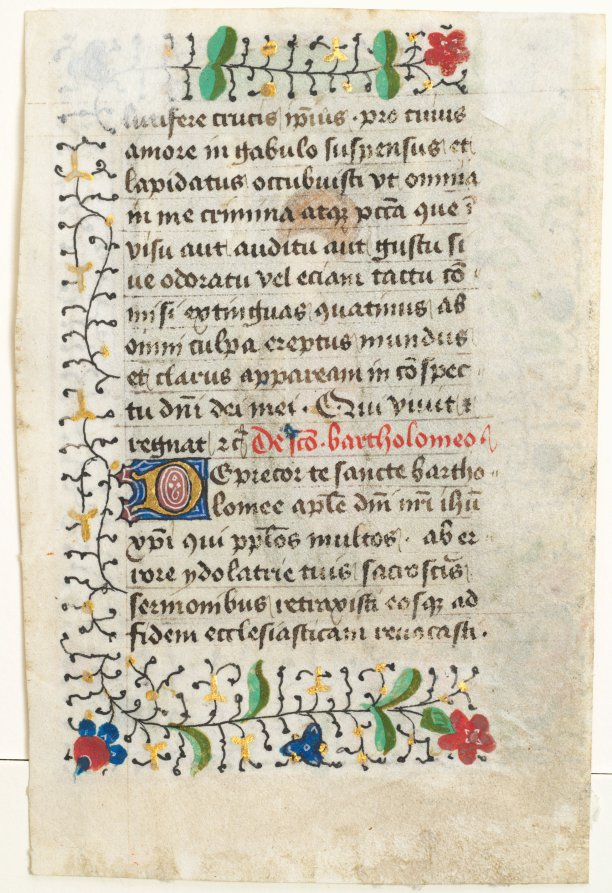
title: Leaf from a Book of Hours: St. Bartholomew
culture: Flanders, Bruges (?), 15th century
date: c. 1440–1460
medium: ink, tempera and gold on vellum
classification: Manuscript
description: Little is known of the life or acts of Saint Bartholomew, one of the twelve apostles. The Golden Legend records the tradition that Bartholomew preached in India and Armenia after Christ’s resurrection. It was in Armenia that the saint was martyred by being flayed alive. His attribute in art, as shown here, is typically a knife, the instrument of his death. The saint is shown standing within an architectural interior with a paneled ceiling, leaded windows, tiled floor, and a hanging cloth embellished with stars. The artist has not yet been identified, though his slightly expressionistic style and jagged, irregular drapery folds, as well as the border decoration, are typical of Flemish manuscript painting around the mid-1400s.